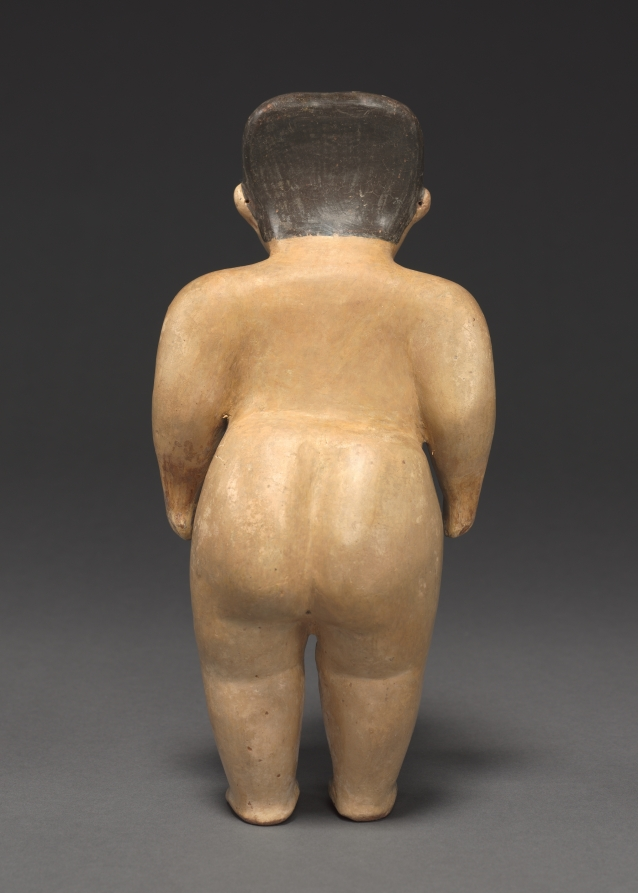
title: Female Figure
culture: Peru, South Coast, Nasca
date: 100 BCE–700 CE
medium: earthenware with colored slips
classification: Sculpture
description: This figure, which may once have worn small garments, might be a tomb offering. Her tapered head reflects the practice of cranial shaping, which may identify her social group and serve as a mark of beauty. Her fleshy hips likely refer to human and plant fertility, since food is the source of such bodily wealth. Her identity is unknown.